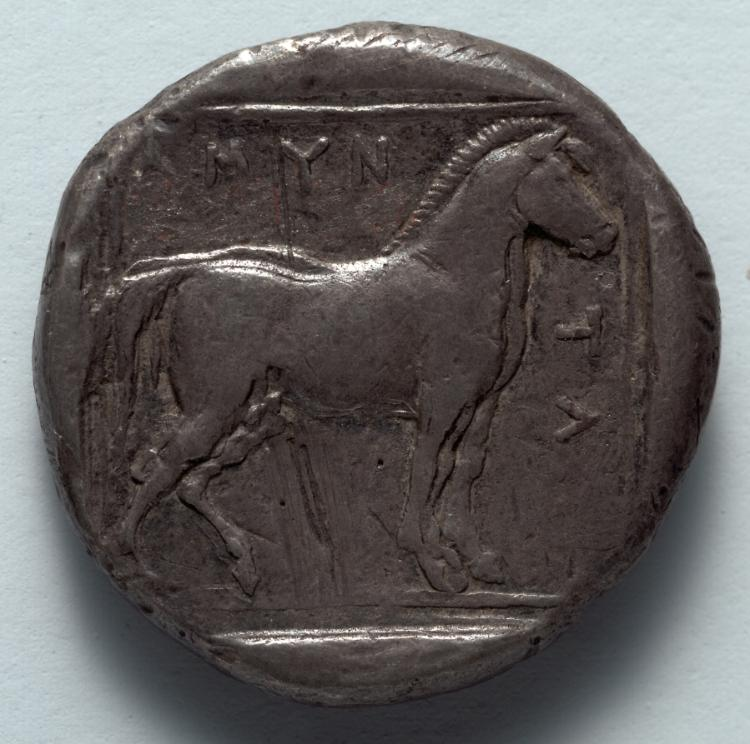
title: Stater: Horse (reverse)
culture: Greek, Macedonian, probably minted at Pella (Macedonia), reign of Amyntas III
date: 389–369 BCE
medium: silver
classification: Coins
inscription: ΑΜΥΝ | ΤΑ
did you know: Amyntas III was the father of Philip II and grandfather of Alexander III (the Great).